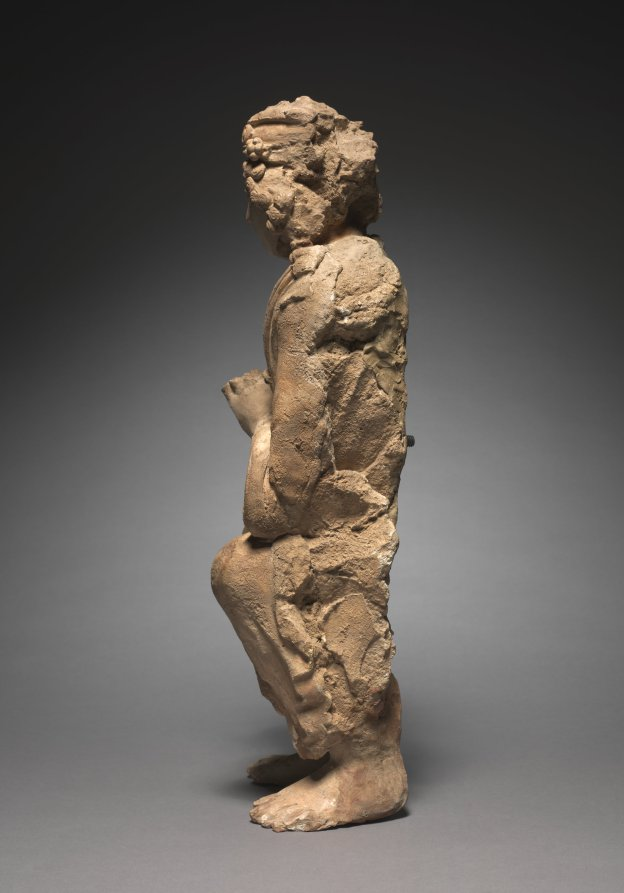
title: Adoring Attendant from a Buddhist Shrine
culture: Afghanistan, Gandhara, Kushan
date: c. 300s–400s CE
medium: stucco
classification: Sculpture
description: The medium of stucco became popular after the 4th century for works made for Buddhist sanctuaries, especially in the desert regions of Afghanistan where stone was less available. The more malleable material allowed sculptors to create sensitive and supplely modeled forms. The stucco sculptures were covered with a thin coat of lime-based whitewash, then painted; traces of original red pigment remain in some areas.